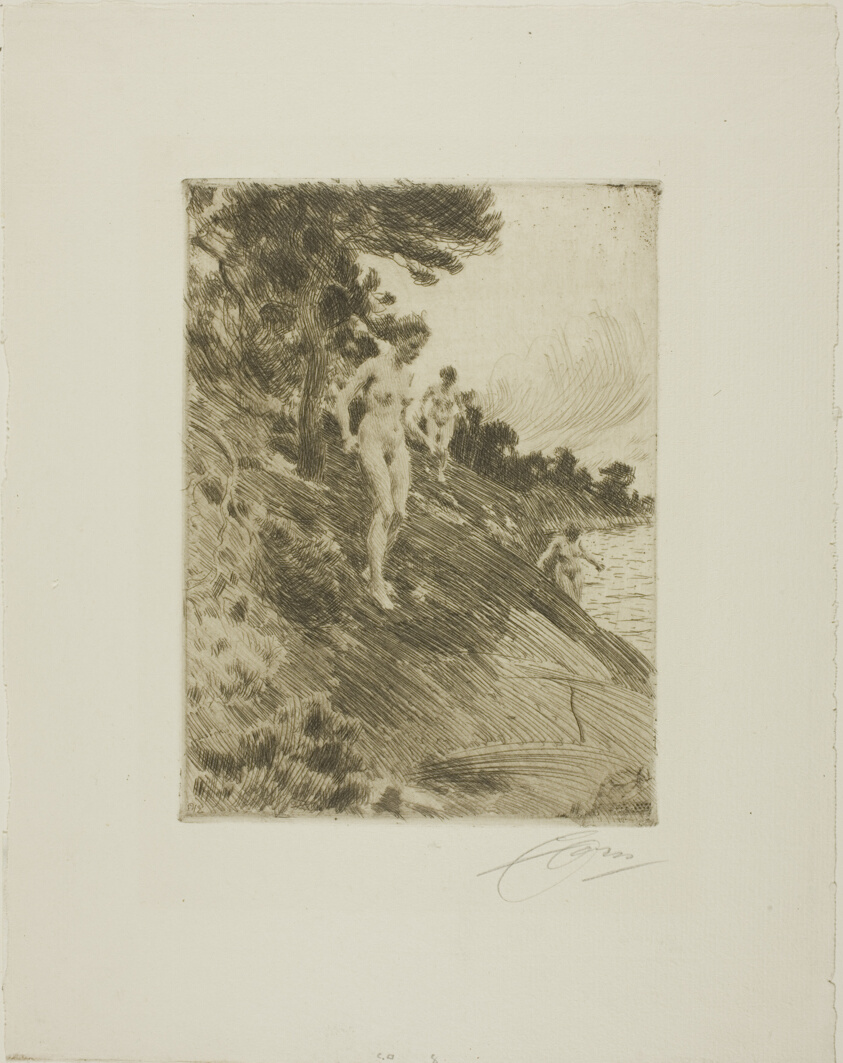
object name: Print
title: Frightened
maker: Anders Zorn (Swedish, 1860-1920)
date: 1912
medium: Etching on ivory laid paper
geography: Sweden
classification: etching; print; prints and drawing